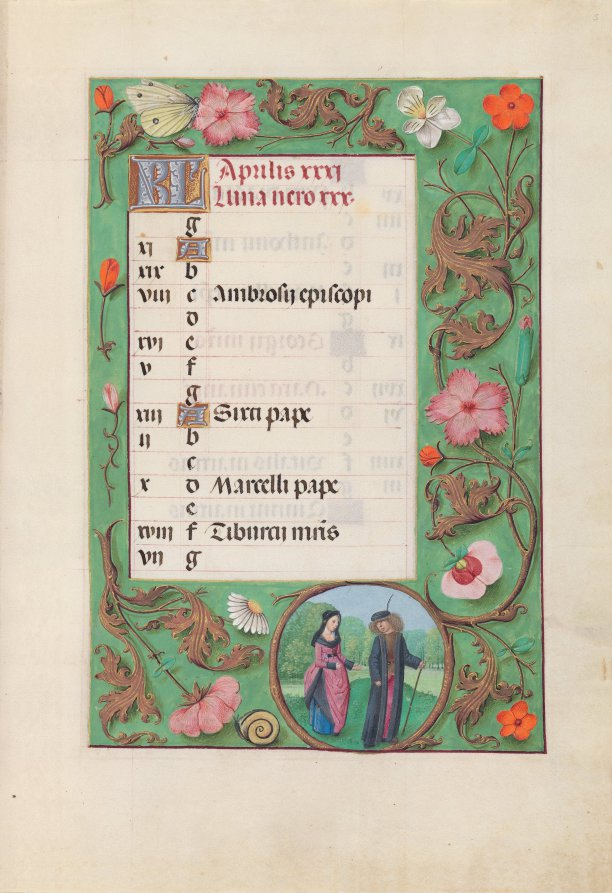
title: Hours of Queen Isabella the Catholic, Queen of Spain: Fol. 5r, April - Squire and Damsel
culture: Flanders, Ghent and Bruges, late 15th century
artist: Master of the First Prayerbook of Maximillian (Flemish, c. 1444–1519)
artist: and Associates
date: c. 1500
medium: ink, tempera, and gold on vellum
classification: Bound Volume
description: This manuscript was illuminated by a circle of at least five highly organized manuscript painters active in the Flemish cities of Ghent and Bruges. The principal illuminator was Alexander Bening, who painted the majority of the book's miniatures. Manuscripts produced by this circle of artists are renowned for the decoration of their borders, which typically feature a rich variety of realistically painted flowers, birds, and butterflies. This prayer book, called a book of hours, was intended not for a cleric but for the private devotions of a lay person—in this case, Isabella the Catholic, Queen of Spain (1451–1504); her coat of arms embellishes the book's frontispiece. It is unlikely that the book was commissioned by the Queen herself; rather, she probably received it as a diplomatic gift from someone courting her patronage, perhaps Cardinal Francisco Jimenez de Cisneros. A Franciscan friar, Jimenez was dependent upon Isabella for his advancement, first to the post of Queen's confessor in 1492, and then to Archbishop of Toledo in 1495.